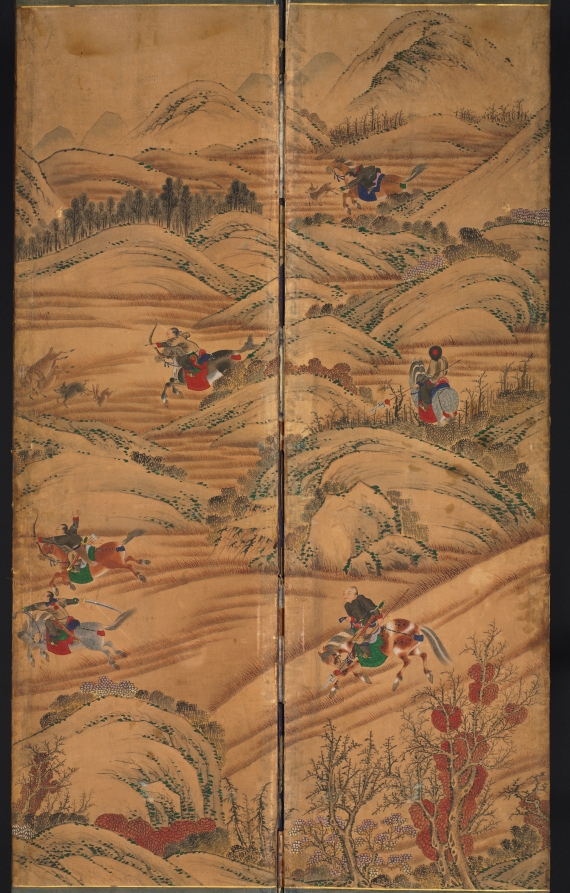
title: Hunting Scene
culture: Korea, Joseon dynasty (1392–1910)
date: 1800s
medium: eight-panel folding screen; ink and color on silk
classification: Painting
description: The theme of nomad warriors riding horses and hunting wild animals was first painted in the Qing imperial court in China in late 1600s. But it became favored by the Korean royal court and painted by the royal court painter in the late 1700s. The Joseon Korean ruling class members considered Qing nomad warriors to be "barbaric," yet highly admired their hunting and military skills. By the late 1800s, folding screens with the hunting scene were used largely for this dynamic and exotic feature.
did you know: The theme of nomad warriors hunting became highly appreciated in the Korean royal court of the 1700s for the king's particular interests in strengthening the royal army's military prowess.